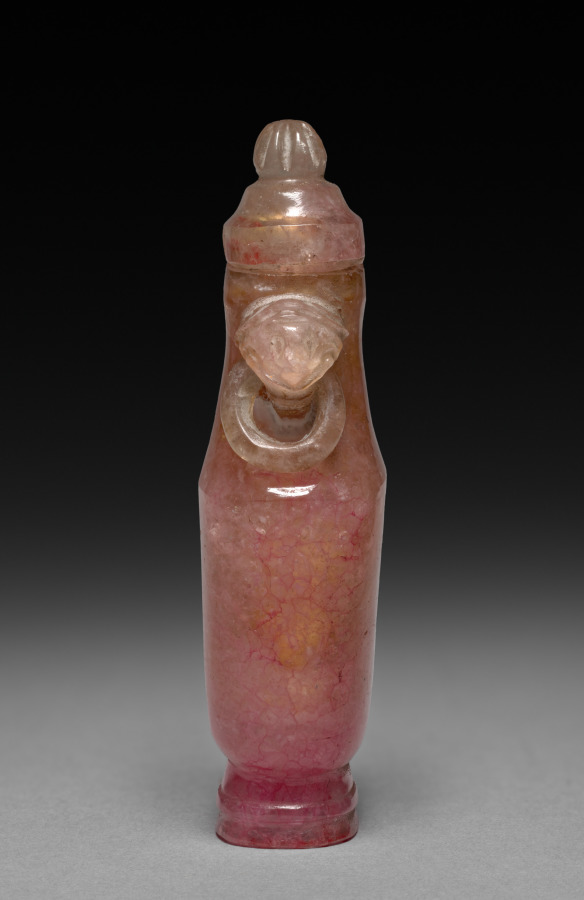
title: Miniature Jar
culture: China, Qing dynasty (1644-1911)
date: 19th-early 20th century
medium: jade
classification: Jade